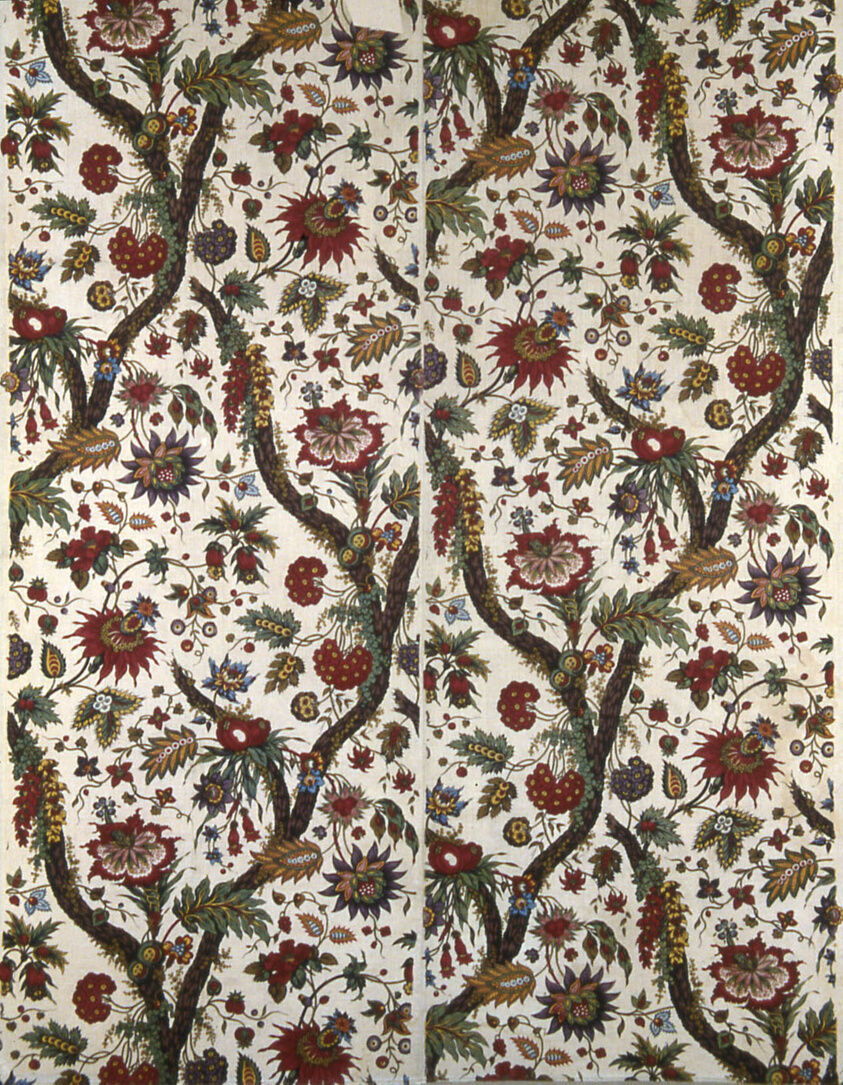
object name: Textile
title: Two Panels (Joined)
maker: Produced by Hartmann et Fils (Associates with Soehnee the Elder and Co.); France, Alsace, Munster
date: 1799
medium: Cotton, plain weave; block printed; two loom widths joined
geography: Munster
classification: textile; weaving - printed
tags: foliage, flowers